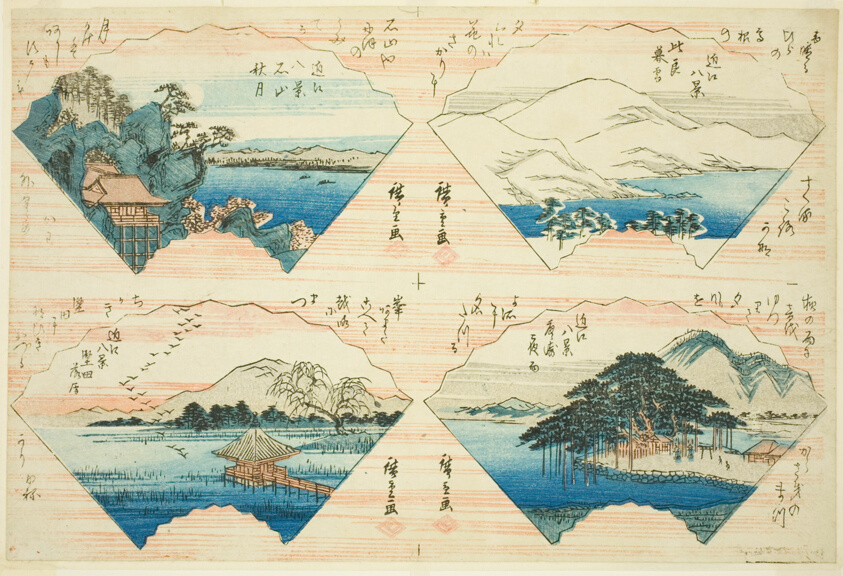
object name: Print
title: Four Views from the series Eight Views of Omi (Omi Hakkei)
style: Japanese (culture or style)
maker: Utagawa Hiroshige 歌川 広重; Japanese, 1797-1858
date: About 1830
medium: Color woodblock print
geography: Japan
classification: woodblock print; print; asian art